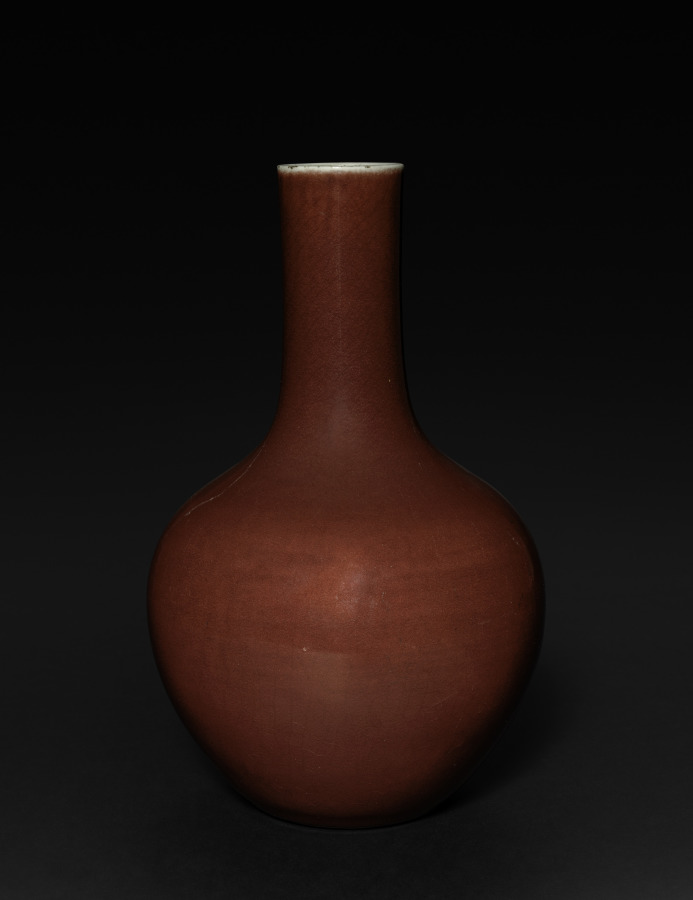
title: Bottle-shaped Vase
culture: China, Qing dynasty (1644–1911), Qianlong reign (1736–95)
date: 1736–95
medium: porcelain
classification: Ceramic